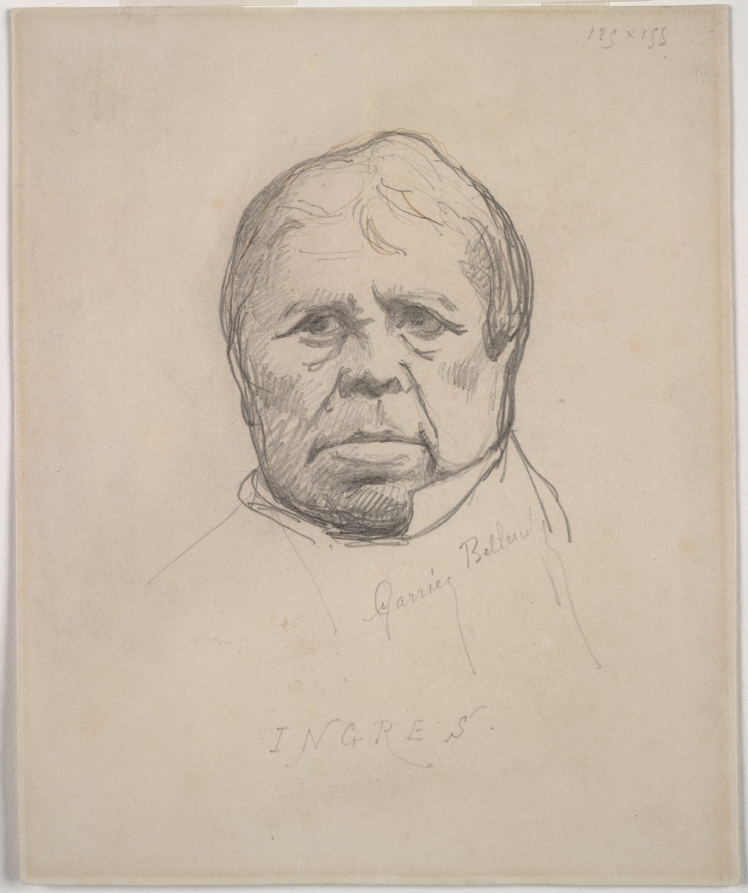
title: Portrait of Ingres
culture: France, 19th century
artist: Albert-Ernest Carrier-Belleuse (French, 1824–1887)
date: c. 1840–67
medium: graphite with brown ink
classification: Drawing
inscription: Signed in body of drawing, l.r. in graphite: Carrier-Belleuse; inscribed in graphite, lower center: Ingres; upper right corner, in graphite: 135 x 155